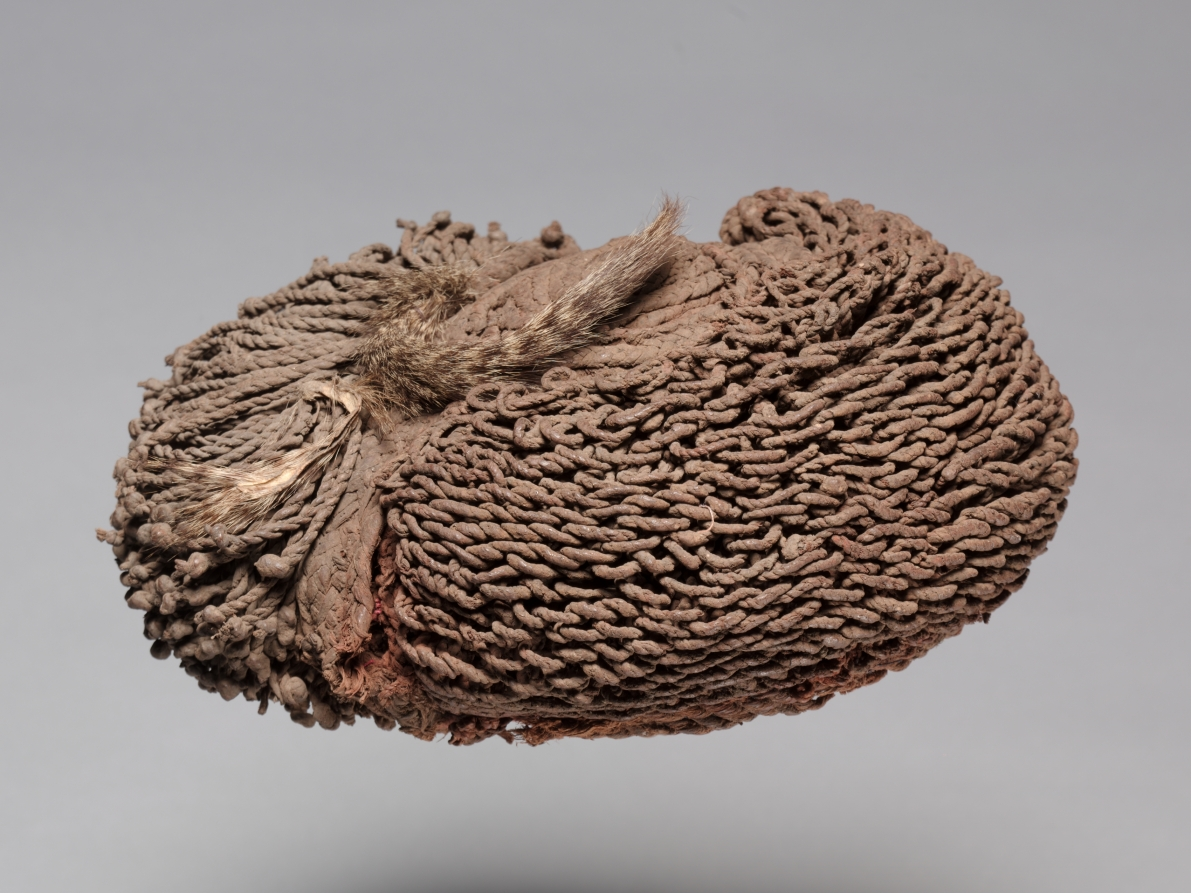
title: Wig (uyembe matota, wiyembe, or pulumba)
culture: Central Africa, Democratic Republic of the Congo or Angola, Chokwe, early to mid 20th century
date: early to mid 1900s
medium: Plant fiber, pelt, and clay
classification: Garment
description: Among the Chokwe, hats, diadems, and wigs of all sorts made in a variety of materials were once commonly worn by both men and women. Some were exclusive to religious and political titles. This wig imitates a female hairstyle in vogue until the 1960s. Made by a male craftsman, it was most typically worn by a woman at dances and other public festivals.